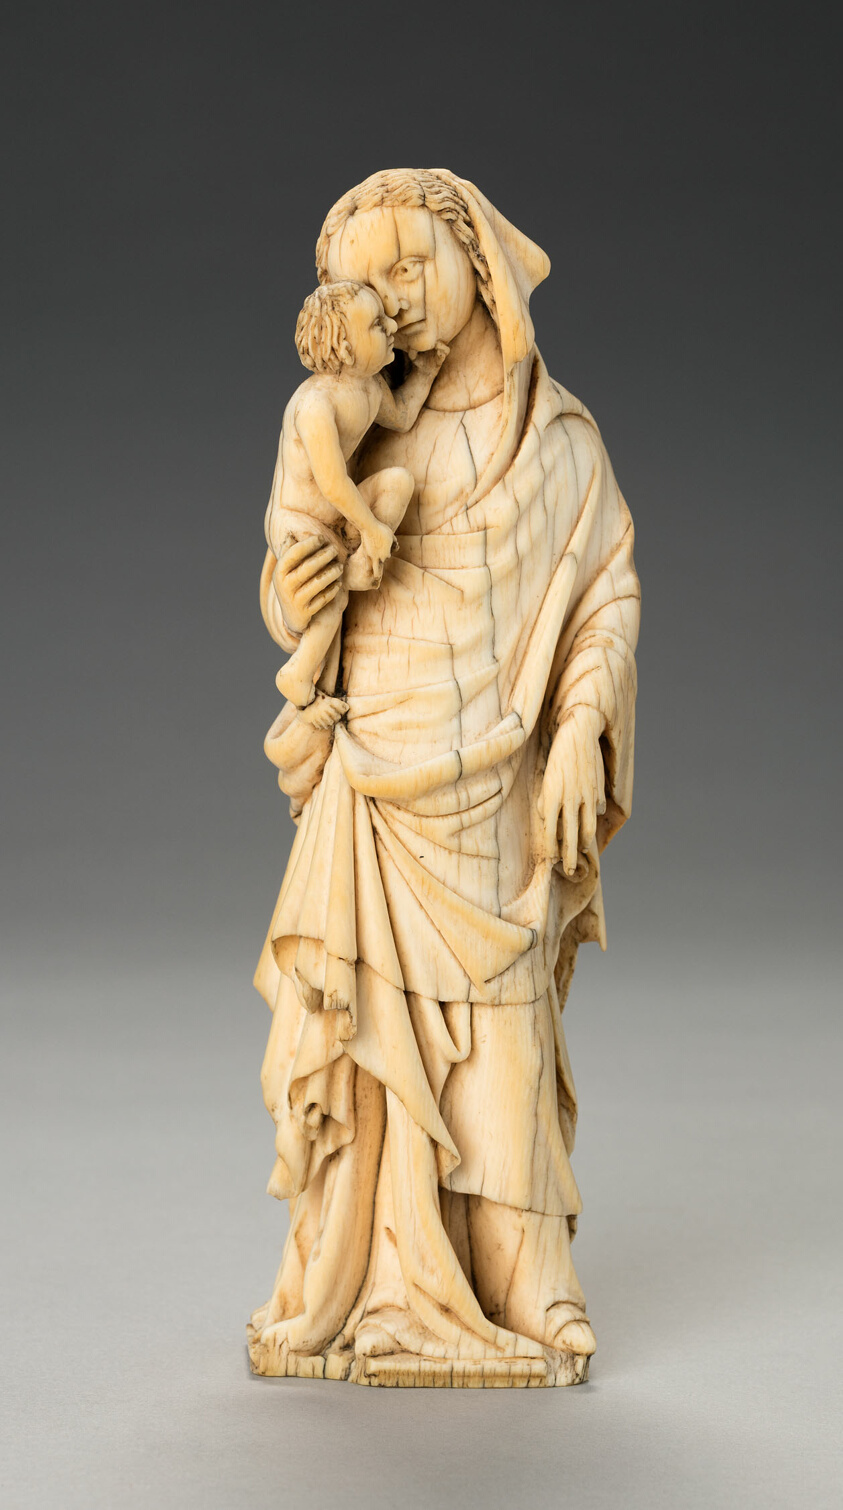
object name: Sculpture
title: Virgin and Child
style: 14th century, medieval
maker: South Netherlandish or German; Rhineland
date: 1350/75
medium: Ivory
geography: Meuse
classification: ivory; statuette; sculpture; german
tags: Virgin and child/Madonna and child, Christianity, Christian subjects, religious figures, religious, religion, babies, figures, woman with children, woman, child, mother and child, sons, mother, Jesus, Virgin Mary